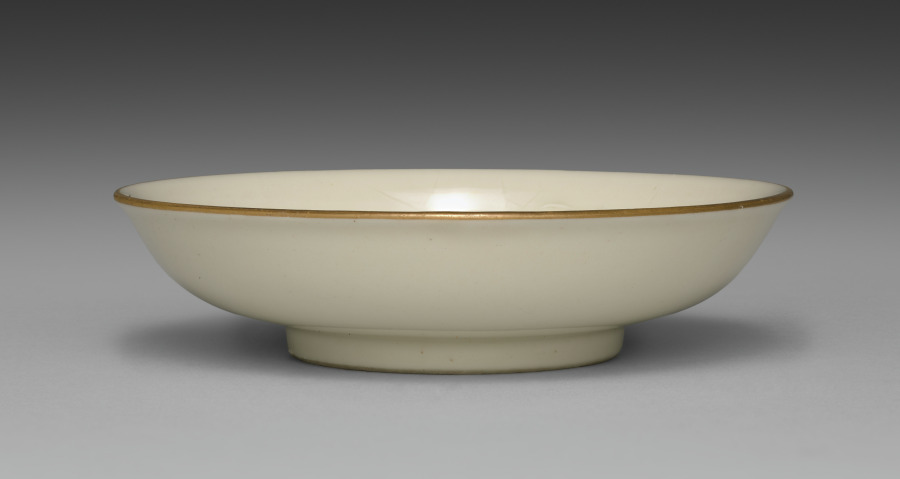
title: Small Dish from Dining Set with Plum Blossoms and Cracked-Ice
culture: Japan, Meiji period (1868–1912)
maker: Seifū Yohei II (Japanese, 1844–1878)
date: c. 1875–78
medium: Porcelain with molded designs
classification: Ceramic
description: Each item in this set has a delicate low-relief design of flowering plum branches over scattered, intersecting lines meant to resemble the cracked-ice surface of a frozen body of water and is signed on the base in gold pigment. While Yohei II produced many fine works in underglaze blue, like those produced by Kiyomizu Shichibei, he also made works in quite different styles later in his career, from the early 1870 s. In 1873, he was appointed purveyor to the Industrial Center of Kyoto Prefecture, a designation associated with Kyoto’s efforts to reach an international market through the port of Kobe; and from 1875 until his death, he was involved in national-level projects to present Japanese ceramics across the world. It was during this period that Yohei III was apprenticed to Yohei II, and it has been suggested that this set may in fact be an early example of Yohei III’s work, which he signed with his teacher’s name. Decorated with flowers resembling Japanese textile motifs, the set calls to mind the design of Yohei II’s pair of vases with plum blossoms in the Victoria and Albert Museum. Here, the elaborate trees created for a formal public exhibition setting have been translated into the approachable blossoms of the genteel domestic environment. While the designs are consistent across the pieces, each raised flower petal and pistil and each incised line in the ice was done by hand, so the cups, bowls, and dishes are similar yet unique. The bottoms of two boxes once identified the set’s owner, but the information has been deliberately obscured with black ink. However, inscriptions still visible appear to indicate two occasions, once at the end of July 1886 , and once again in June 1916 , when parts of the set were requested from Hokura in Niigata Prefecture. The location corresponds to a neighborhood in the present-day city of Jōetsu. The surname Tsuji 辻 also appears on a paper tag affixed to one of the box cloths. Future research may possibly reveal more about their provenance. A vase by Yohei III in a private collection combines the formal grandeur of the Yohei II vases in the Victoria and Albert Museum with the gentler design of this dining set, placing flowering plum trees against soft, scalloped-edge clouds resembling those in golden screens.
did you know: The dining wares have a creamy white coloration that the four boxes containing them identify as Korean in style.